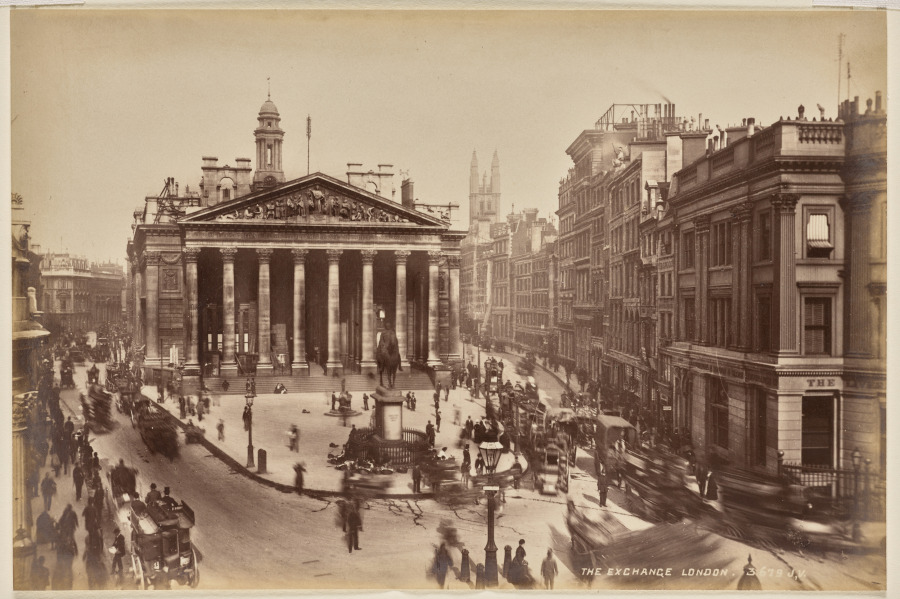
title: The Exchange, London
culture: England, 19th century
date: c. 1880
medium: albumen print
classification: Photograph